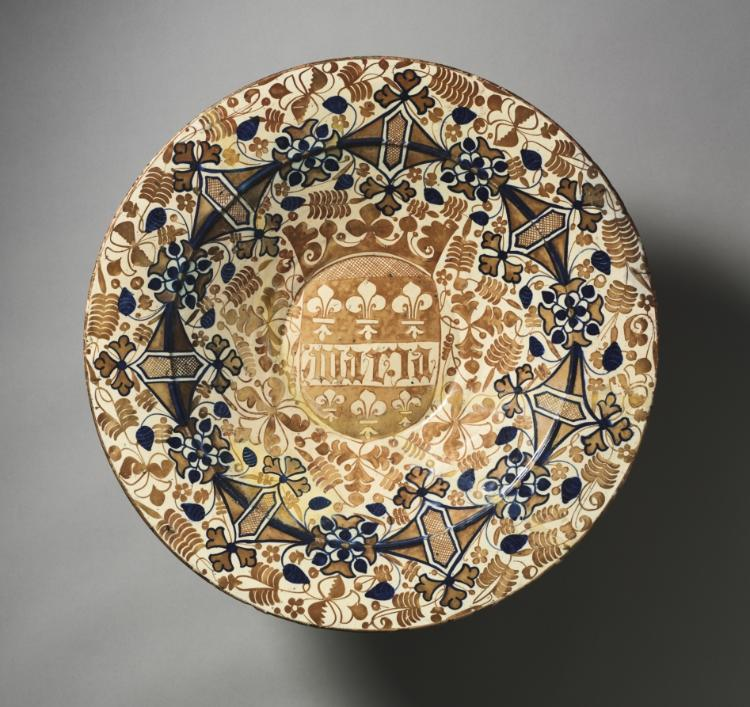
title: Plate with the Name "Maria"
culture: Spain, Valencia, 15th century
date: c. 1437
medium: tin-glazed earthenware, gold lustre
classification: Ceramic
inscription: in center, on front: Maria.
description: Large ornamental plates in this Valencian style became so renowned that personalized examples were ordered not only by Spanish patrons, but also by others in Italy and France. The heraldry and name displayed on this plate suggest that it might commemorate the wedding in 1437 of Marie de Bourbon and Jean, Duke of Calabria.